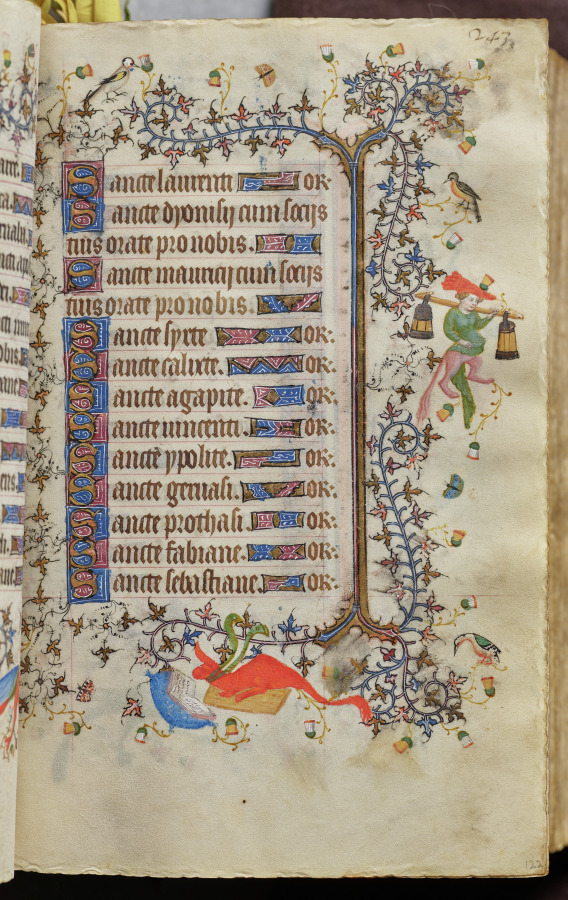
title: Hours of Charles the Noble, King of Navarre (1361-1425): fol. 122r, Text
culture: France, Paris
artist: Master of the Brussels Initials and Associates (French)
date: c. 1405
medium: ink, tempera, and gold on vellum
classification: Bound Volume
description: This precious volume was obviously highly prized by its owner, the French-born King of Navarre, who had his coat of arms painted on no less than twenty folios. Rather than directly commissioning this manuscript from a specific workshop, it seems that Charles the Noble acquired his book of hours -- perhaps ready-made for the luxury market -- while on a trip to Paris in 1404-05. A collaborative effort, six painting styles are evidenced within the pages of this codex, those of two Italians, two Frenchmen, and two Netherlanders. The painter who was responsible for the planning and decoration of the book, and who produced seventeen of the large miniatures, was a Bolognese artist known as the Master of the Brussels Initials. His principal assistant, responsible for most of the borders, was a Florentine who signed his name "Zecho" da Firenze on folio 208 verso.